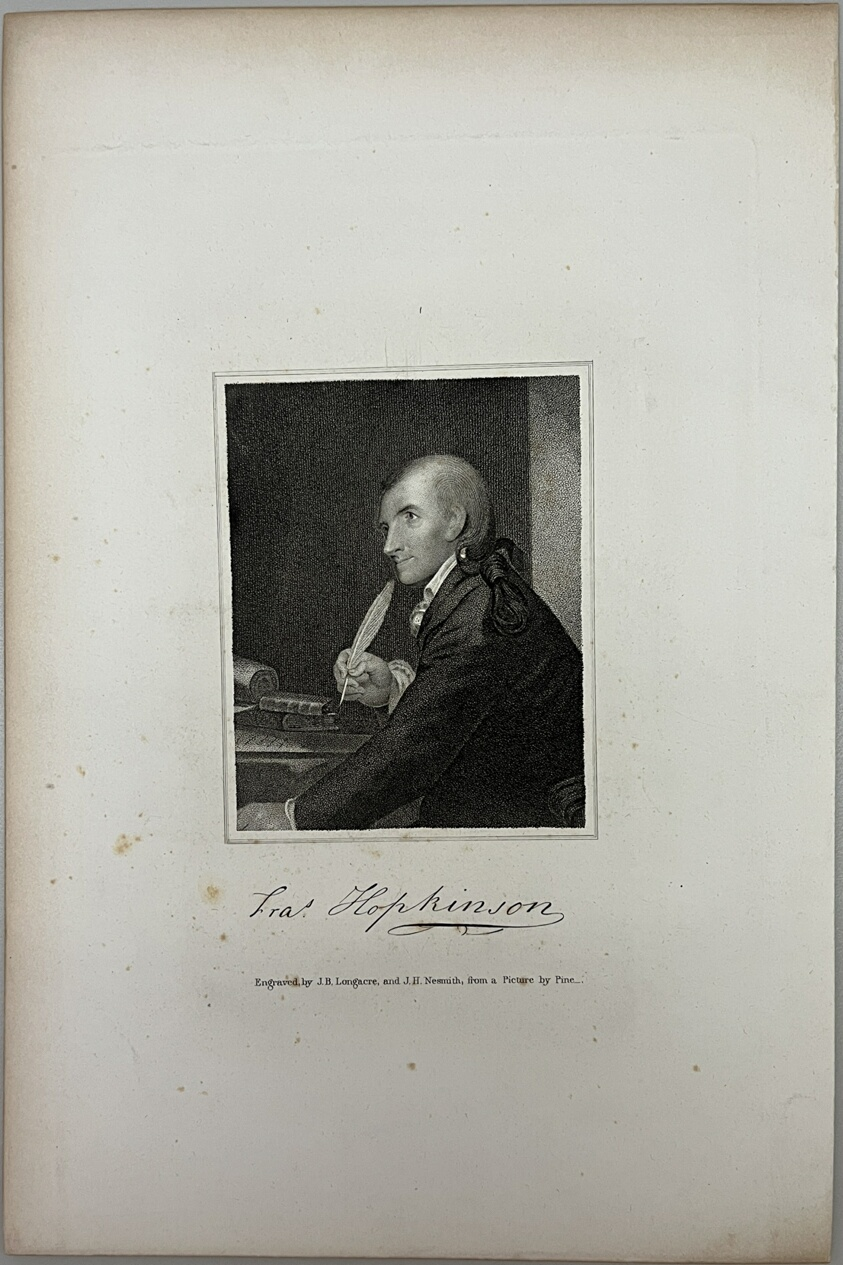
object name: Print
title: Francis Hopkinson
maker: James Barton Longacre (American, 1794-1869); and J.H. Nesmith (likely American, 19th century); after Robert Edge Pine (British, 1742-1788)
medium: Stipple engraving on paper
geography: United States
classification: reproduction; print; prints and drawing